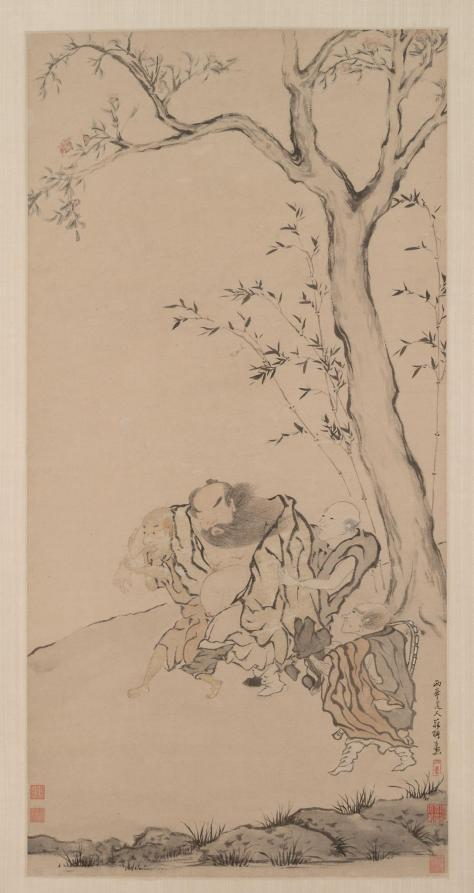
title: Zhong Kui Supported by Ghosts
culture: China, Qing dynasty (1644–1911)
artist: Luo Ping (Chinese, 1733–1799)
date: 1700s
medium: hanging scroll; ink and light color on paper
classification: Painting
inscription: 兩峰道人羅聘畫 【印】 兩峰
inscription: 4 additional seals: 3 of Dai Zhi 戴植 (19th c.); 1 of Ren Bonian 任伯年 [Ren Yi 任頤] (1840–1895)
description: In popular belief, Zhong Kui is a powerful guard against evil spirits, particularly on New Year’s Day and at the Double-Fifth Festival, on the fifth day of the fifth lunar month, when his image is displayed in households to prevent diseases and other misfortunes.